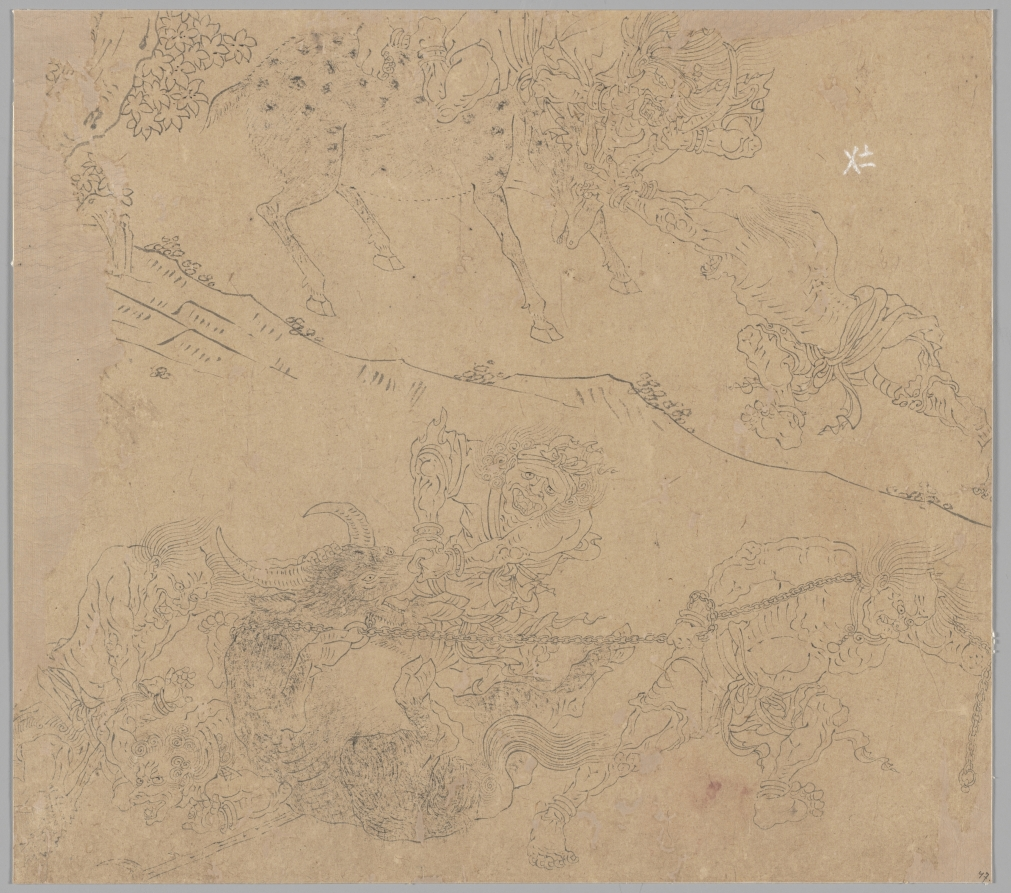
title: Album of Daoist and Buddhist Themes: Search the Mountain: Leaf 47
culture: China, Southern Song dynasty (1127-1279)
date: 1200s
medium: Album, ink on paper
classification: Painting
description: This extraordinary album has 50 paintings on a variety of religious subjects. They were likely created by several master craftsmen to share with studio apprentices as models for fulfilling commissions. The Jade Emperor and the Daoist pantheon make up the first 26 leaves. The next 14 leaves portray the Buddhist Ten Kings of Hell administering punishments to the dead. The third section, called “Clearing the Mountains,” features divine soldiers, led presumably by the deity Erlang Shen 二郎神, fighting undesirable creatures.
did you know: Three demon-soldiers drag an ox on its back with a chain. Above, others take a deer by its antlers.